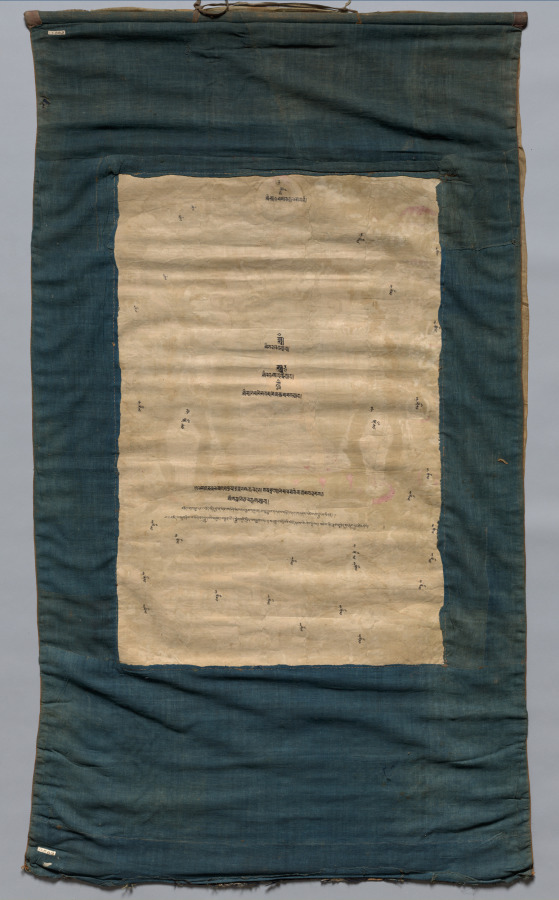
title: Shakyamuni Buddha with scenes from his life story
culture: Tibet, Qing dynasty (1644–1911)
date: c. 1700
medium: gum tempera on cloth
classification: Painting